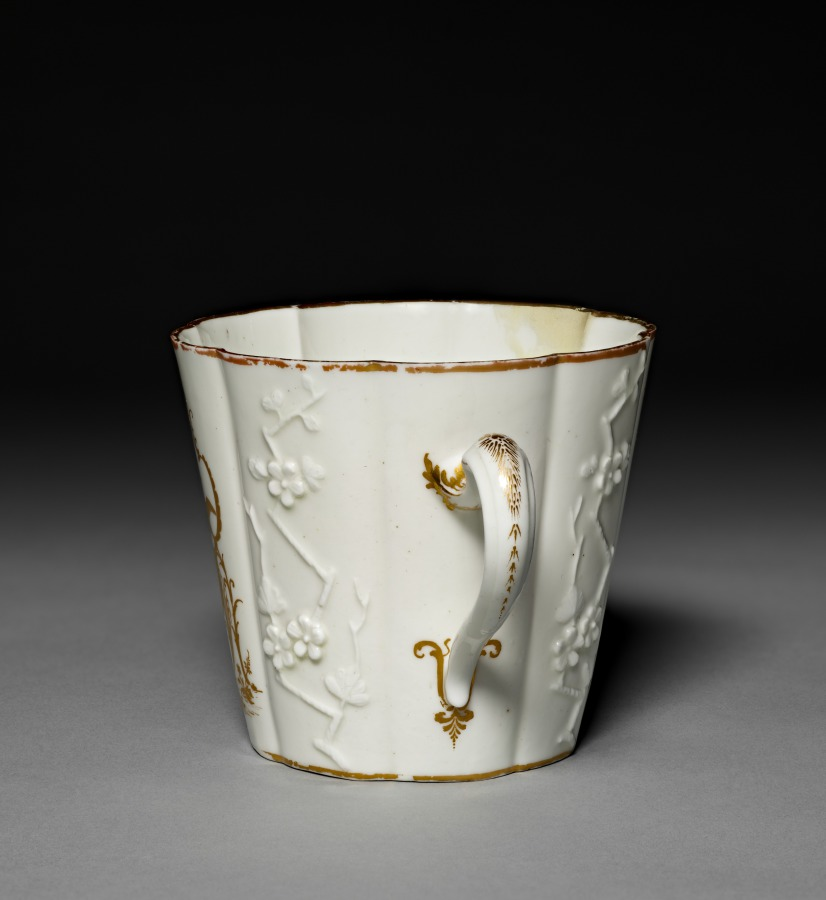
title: Cup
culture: France, Vincennes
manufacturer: Vincennes Porcelain Factory (France, 1740–56)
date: c. 1750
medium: soft-paste porcelain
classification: Ceramic